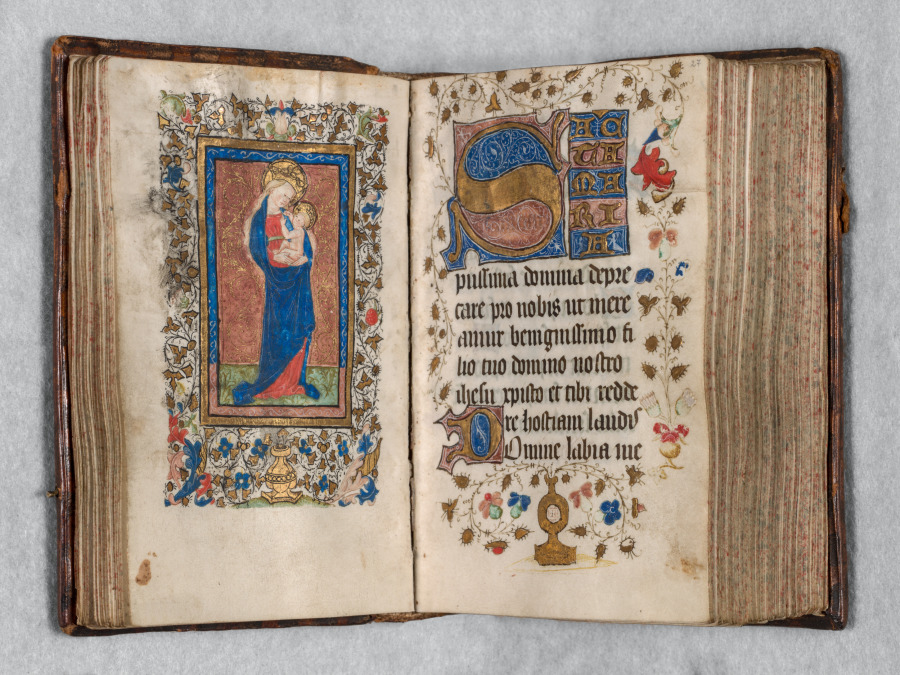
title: Book of Hours (Use of Metz): Fol. 27r, Decorated Initials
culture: France, Metz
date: c. 1440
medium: ink, tempera, and gold on vellum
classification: Bound Volume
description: This volume contains only one full-page miniature of the standing Virgin with Child. It introduces the prayer: "Holy Mary, faultless Lady, intercede for us. . . . " The first seven folios of the book list dedications of Metz churches and indulgences that are unique to that diocese. The city of Metz, situated on the Moselle River, was the cultural and commercial capital of Lorraine during the 1400s. It was also the location of an important bishopric (diocese of a bishop) and therefore the center of a growing book trade.